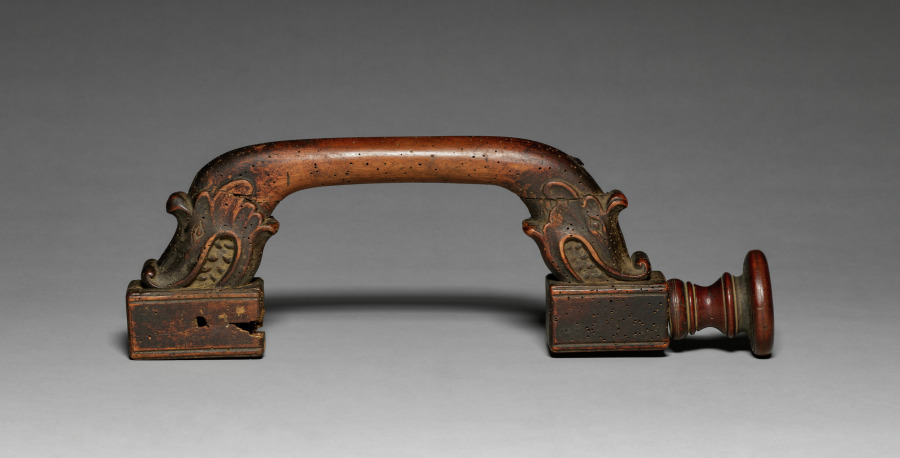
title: Brace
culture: Europe, 17th century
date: 1600s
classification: Tool